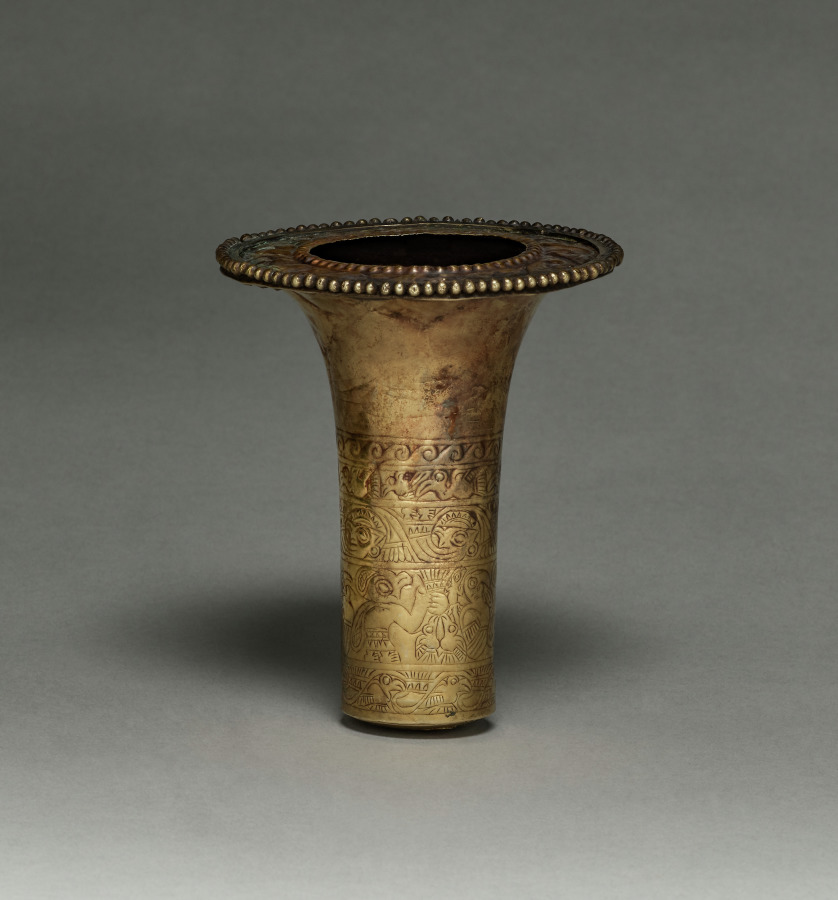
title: Ear Flare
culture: Peru, North Coast, Chimú style (900-1470)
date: 900–1470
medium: hammered gold alloy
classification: Metalwork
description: North Coast ear ornaments typically have a long shaft that balanced the weight of the glorious frontal. This pair illustrates Chimú interest in the sea, which had great economic and religious importance. On the shafts are bands of seabirds and waves, and a similar pattern edges the frontals, which were altered in modern times. Originally solid disks, the frontals' centers were cut out and a dotted band was added to the rim.